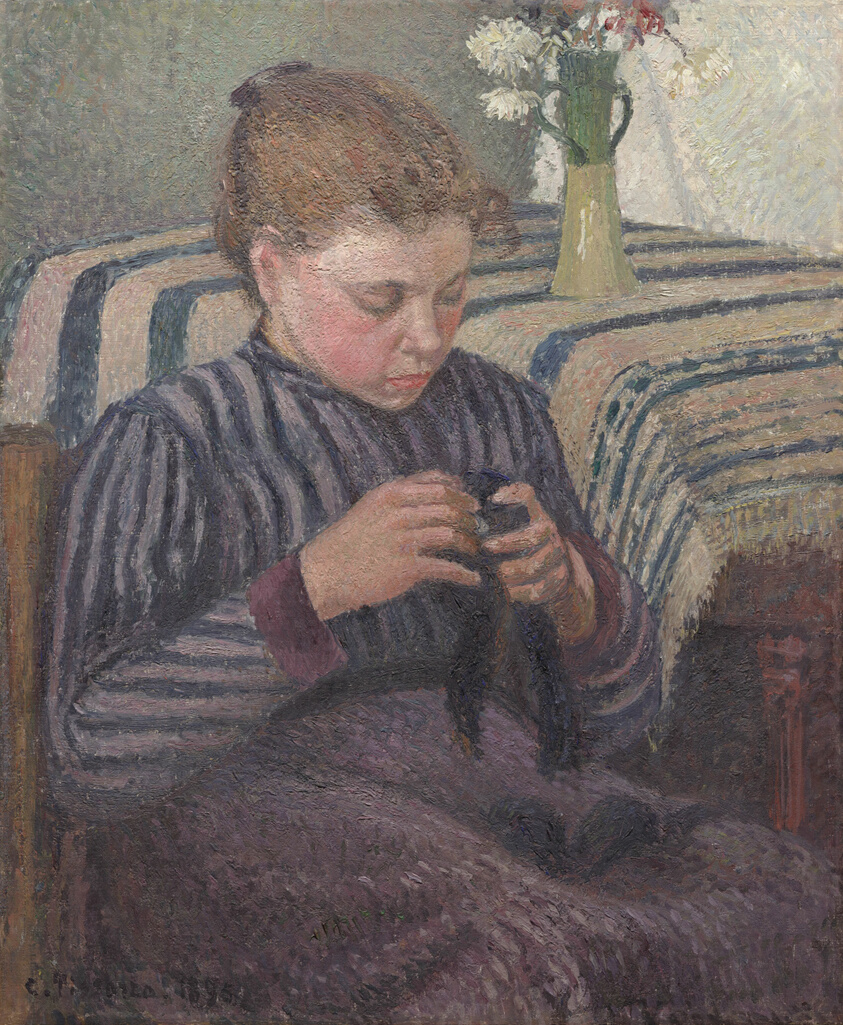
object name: Painting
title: Woman Mending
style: Post-Impressionism, nineteenth century, 19th century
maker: Camille Pissarro (French, 1830–1903)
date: 1895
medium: Oil on canvas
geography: France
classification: oil on canvas; paint; oil paintings (visual works); french; painting; european painting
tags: women, sewing, interior, table, tablecloth, vase, flowers, purple (color), stripes, work, everyday life (genre), portraits